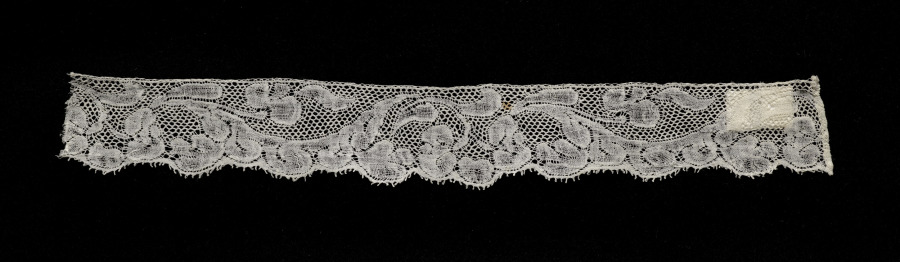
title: Lace Edging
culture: France, Valenciennes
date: 1700s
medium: Linen: bobbin lace (Valenciennes)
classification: Lace